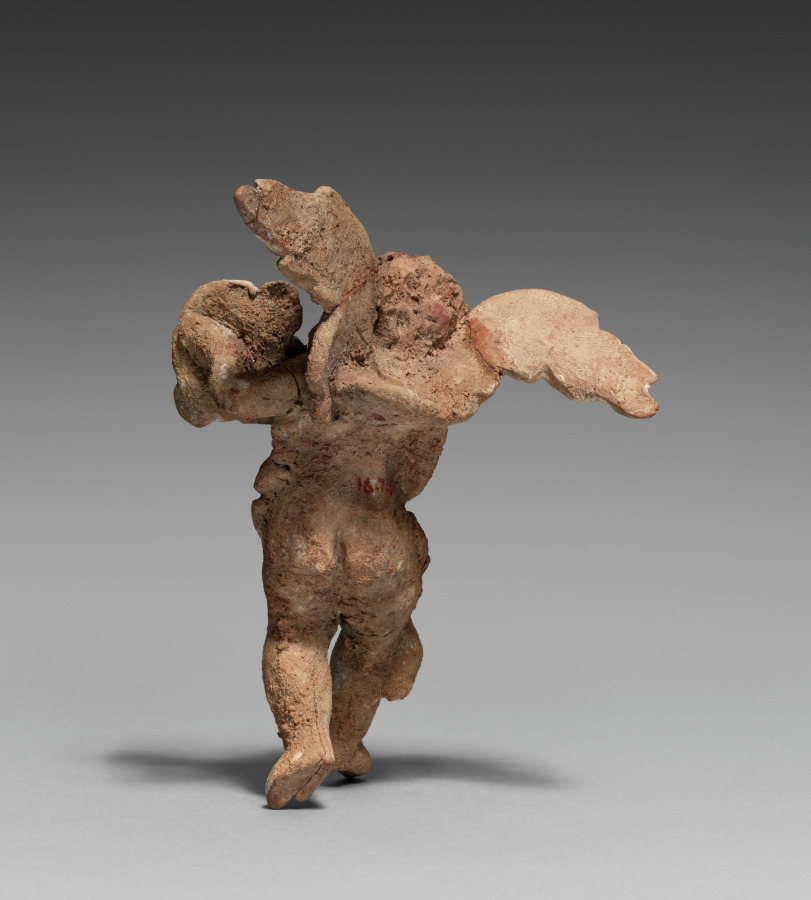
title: Figurine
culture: Greece, Myrina, Hellenistic period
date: 300–100 BCE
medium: terracotta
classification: Sculpture